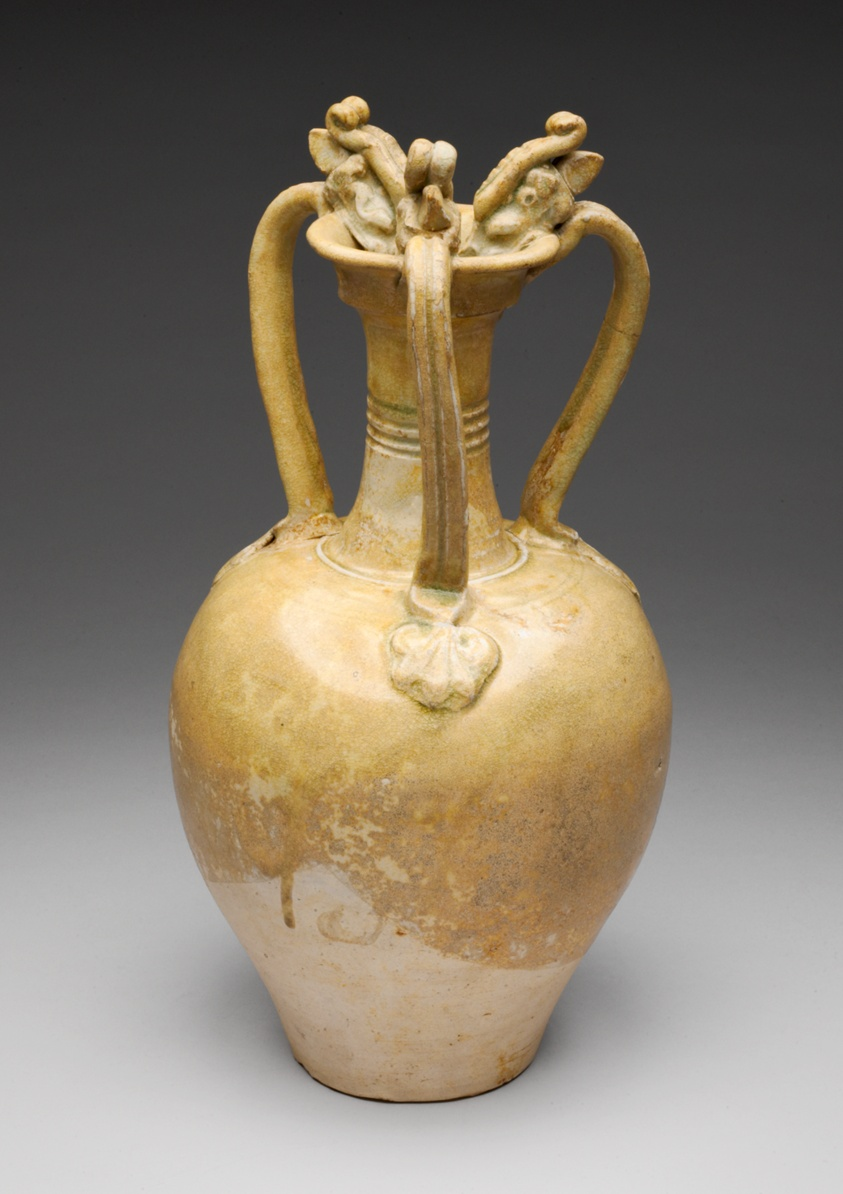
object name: Decorative Arts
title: Amphora with Three Dragon-Shaped Handles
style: Chinese (culture or style)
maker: China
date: Tang dynasty (618–907), 8th century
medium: Stoneware with yellowish-white glaze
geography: China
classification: ceramics; asian art; decorative arts